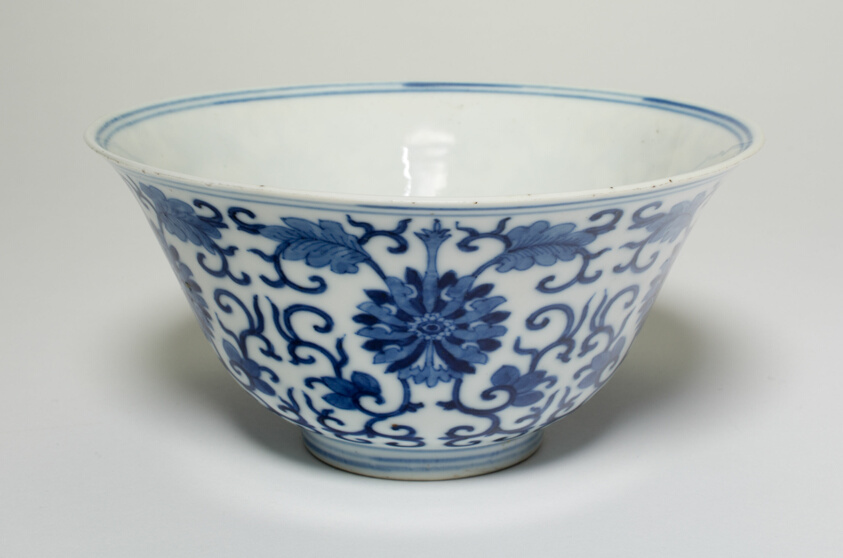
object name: Vessel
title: Bowl with Floral Scrolls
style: Chinese (culture or style)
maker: China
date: Qing dynasty (1644–1911), Guangxu reign mark and period (1875–1908)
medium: Porcelain painted in underglaze blue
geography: China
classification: bowl; porcelain; dish (vessel); asian art; ceramics; vessel